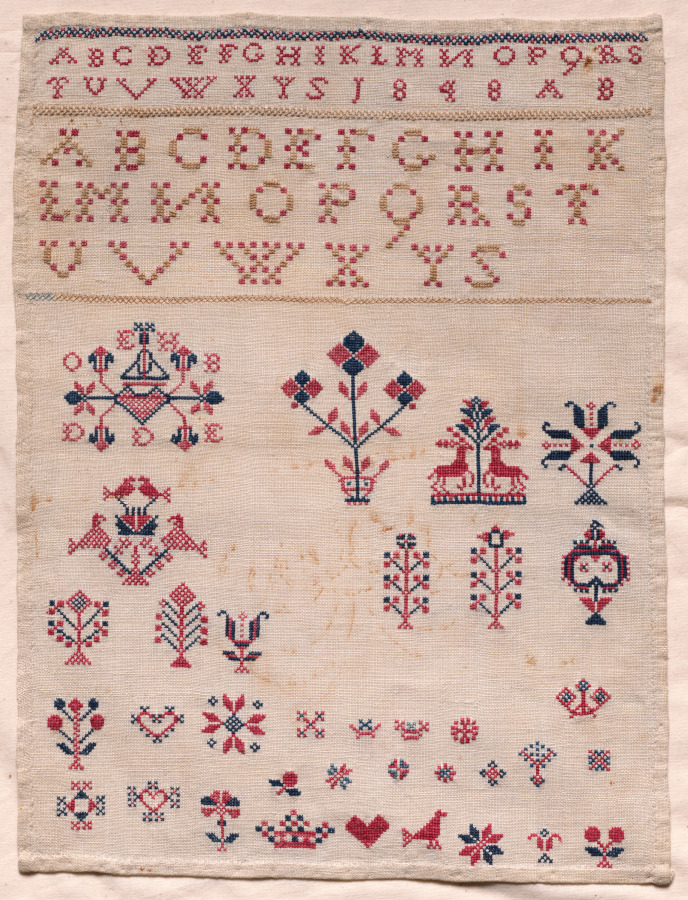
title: Sampler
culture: America, Pennsylvania Dutch, 19th century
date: 1848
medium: embroidery; cotton on linen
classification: Sampler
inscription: two alphabets with "J" omitted and date "1848" across top.